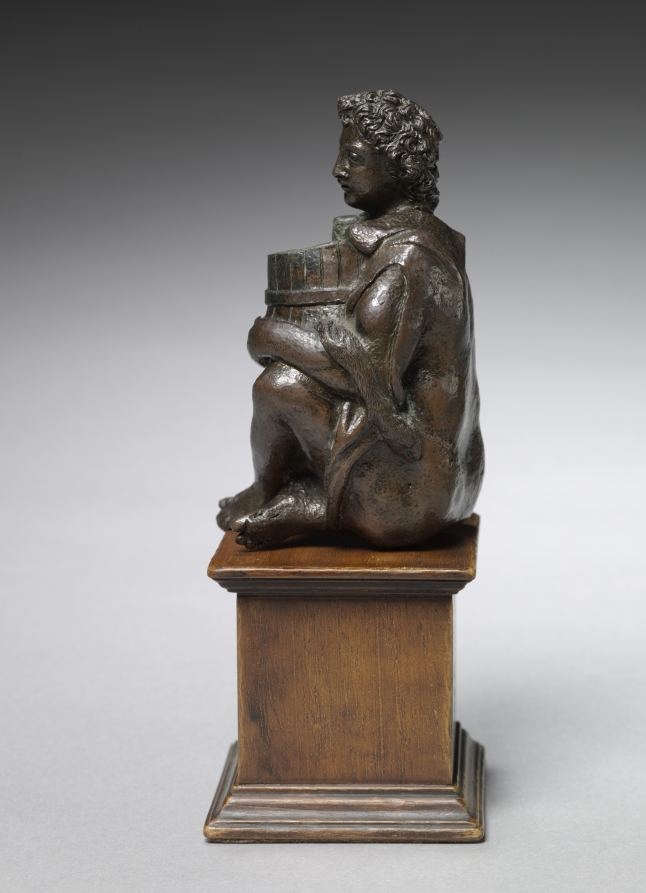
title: Seated Boy Clothed with Goat Skins Holding an Open Barrel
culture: Italy, Padua, 16th century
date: c. 1525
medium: bronze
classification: Sculpture